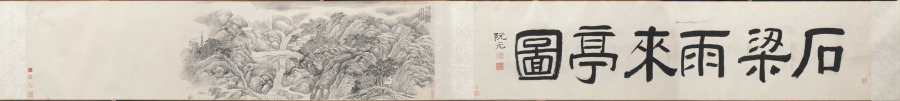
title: Rain-coming Pavilion by the Stone Bridge at Mt. Tiantai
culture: China, Qing dynasty (1644-1911)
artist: Dai Xi (Chinese, 1801–1860)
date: 1848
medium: handscroll, ink on paper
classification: Painting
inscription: Artist's inscription, signature, and 2 seals: Painting of Rain-Coming Pavilion by the Stone Bridge at Mount Tiantai. In the twenty-eighth year of the Daoguang era [1848], the third lunar month, requested by and painted for Pan Gongfu 潘功甫 [Pan Zengyi 潘曾沂], a senior family friend. [signed] Your junior, Dai Xi from Qiantang. [seal] Hebi jian Dai 何必見戴. [seal, lower right corner] Shih-ping yeh.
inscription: Title on frontispiece and 3 seals of Ruan Yuan (1764-1849). 1 colophon and 10 additional seals: 1 colophon, dated 1838, and 8 seals of Pan Zengyi (1792-1853); 2 seals unidentified.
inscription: Colophon by Pan Zengyi: The T'anhua [a flower that blooms only momentarily in semi-tropical areas] Pavilion near Shiliang [the natural stone bridge] was built by the Grand Chancellor Jia. It lasted over seven hundred years. After it was destroyed this year, I happened to be there, so I suggested it be reconstructed. Among the six poems commemorating my visit, one reads: The career of the Prime Minister may be as great as the rivers and lakes,/ Unaware himself of the fact there is leaking./ I had been all over the seventy-two peaks of P'eng-lai mountains/ When the timely rain came to T'an-hua Pavilion. It had not been raining for a long time there, then unexpectedly, the rain came simultaneously with my arrival; the old monk there asked me to change the name to Rain-Coming Pavilion, in order to record the joy. The hilly fields at Mt. Tiantai have suffered by droughts. If, from this year on, they have the timely rain to bring along bountiful harvests and make people happy - so may this pavilion be our witness. Hsiao-fu shan-jen, Pan Zengyi recorded this on the first day of the twelfth lunar month in the wuxu year [1838]. Chiang Yung-ching copied respectfully on the first day of the sixth lunar month in the wushen year [1848]. trans. LYSL/WKH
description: The subject is not just Mount Tiantai in Zhejiang Province, the ancient seat of the most powerful Buddhist sect of Sui and Tang dynasties, but records a specific occasion in 1838 when an official visited Tiantai and began the reconstruction of a historic pavilion. As this coincided with the end of a long drought, the building was auspiciously renamed the Yulai (Rain-Coming 雨來) Pavilion. Ten years later, Dai Xi painted this handscroll to commemorate the occasion.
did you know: Dai Xi actively resisted the Taiping rebels and drowned himself after their 1860 capture of his hometown, Hangzhou. For this loyal deed, Dai was posthumously rewarded with a temple built in his name.